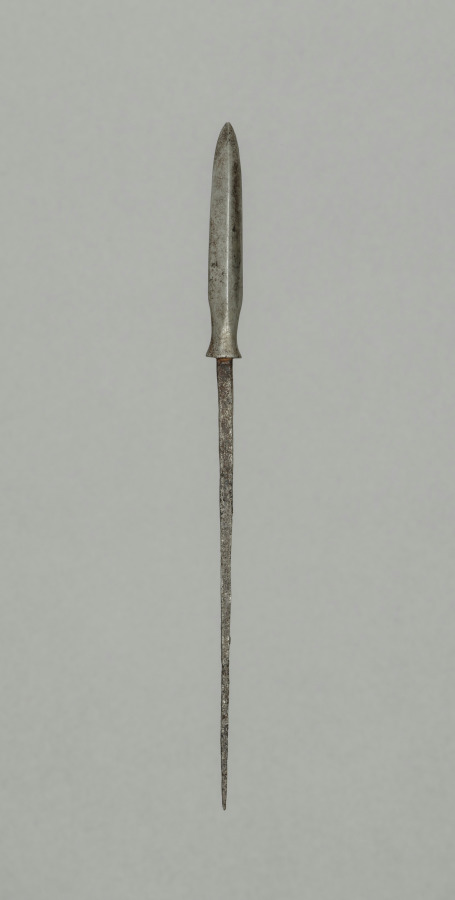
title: Arrow Point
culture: Japan, Edo period (1615–1868)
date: 1700s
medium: steel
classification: Arms and Armor